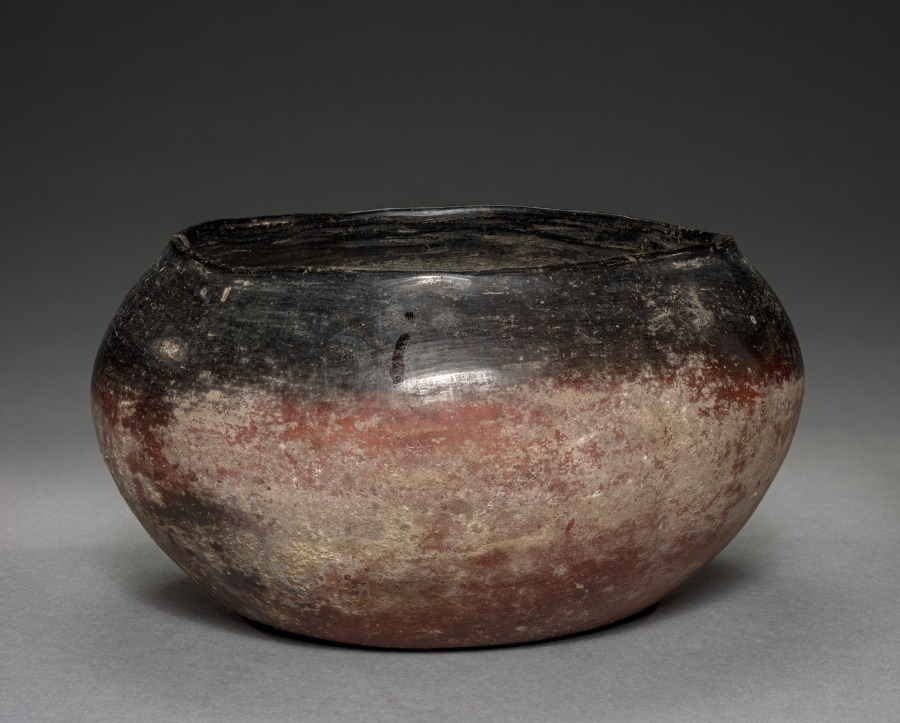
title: Black-Topped Bowl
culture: Egypt, Predynastic (5000–2950 BCE), Naqada II (3650–3300 BCE)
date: 4000–3000 BCE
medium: Nile silt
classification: Vessels